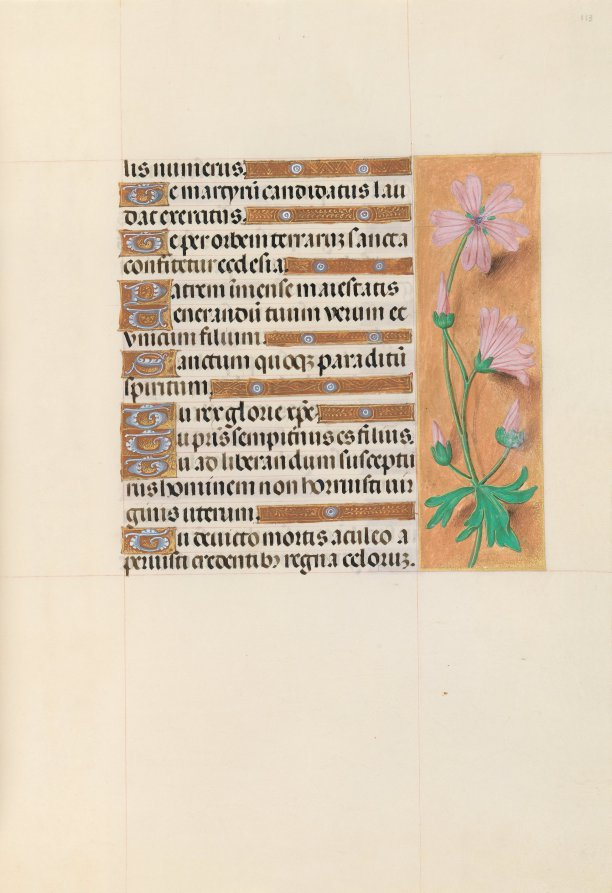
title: Hours of Queen Isabella the Catholic, Queen of Spain: Fol. 113r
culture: Flanders, Ghent and Bruges, late 15th century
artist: Master of the First Prayerbook of Maximillian (Flemish, c. 1444–1519)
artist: and Associates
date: c. 1500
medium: ink, tempera, and gold on vellum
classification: Bound Volume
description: This manuscript was illuminated by a circle of at least five highly organized manuscript painters active in the Flemish cities of Ghent and Bruges. The principal illuminator was Alexander Bening, who painted the majority of the book's miniatures. Manuscripts produced by this circle of artists are renowned for the decoration of their borders, which typically feature a rich variety of realistically-painted flowers, birds, and butterflies. This prayer book, called a book of hours, was intended not for a cleric, but for the private devotions of a lay person-in this case, Isabella the Catholic, Queen of Spain (1451-1504). Isabella's coat of arms embellishes the book's frontispiece. It is unlikely that the book was commissioned by the Queen herself; rather, she probably received it as a diplomatic gift from someone courting her patronage, perhaps Cardinal Francisco Jimenez de Cisneros. A Franciscan friar, Jimenez was dependent upon Isabella for his advancement, first to the post of Queen's confessor in 1492, and then to Archbishop of Toledo in 1495.